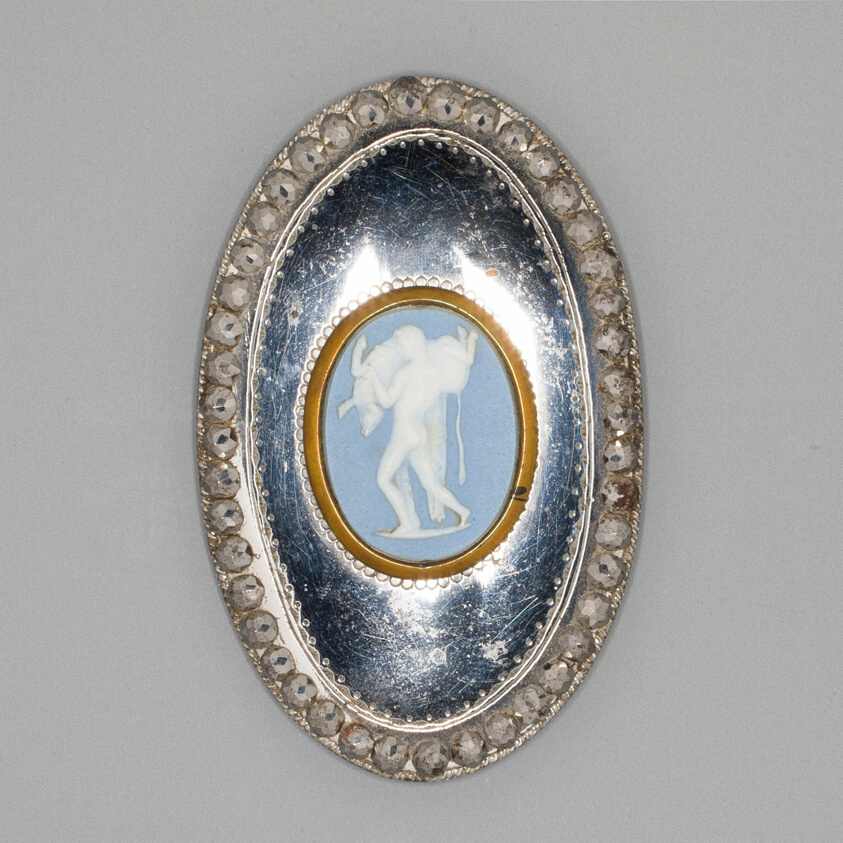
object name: Ceramics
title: Cameo with Hercules and Bull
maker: Wedgwood Manufactory (England, founded 1759)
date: Late 18th century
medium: Stoneware (jasperware)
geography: Burslem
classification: cameo (sculpture); sculpture; stoneware; european decorative arts; ceramics